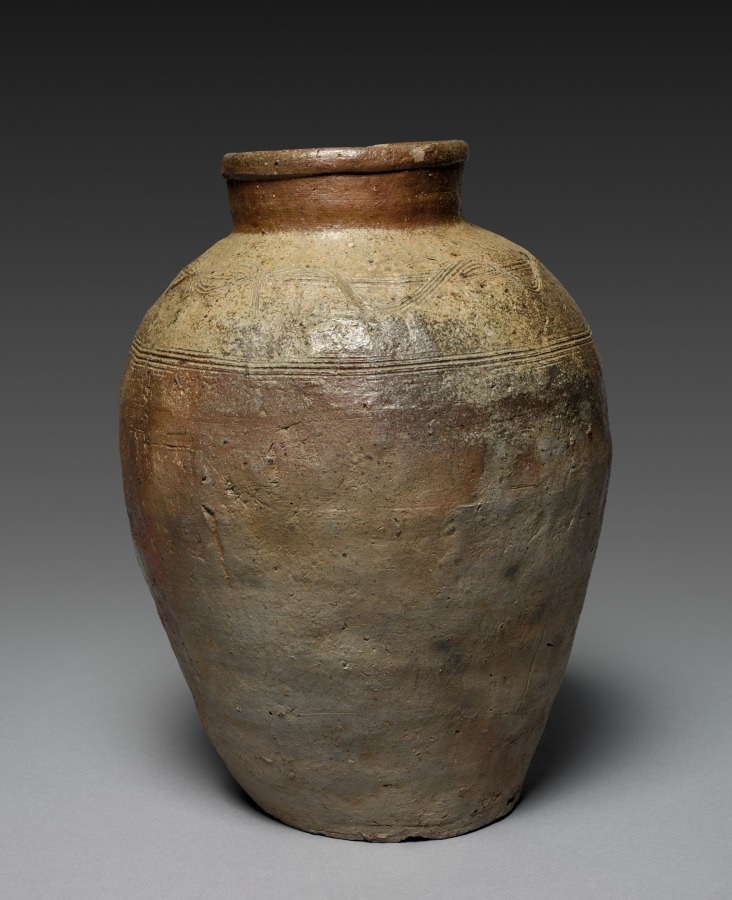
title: Jar with Incised Combed Shoulder Designs: Bizen Ware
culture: Japan, Muromachi period (1392–1573)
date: 1400s–1500s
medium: stoneware, ash glaze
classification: Ceramic